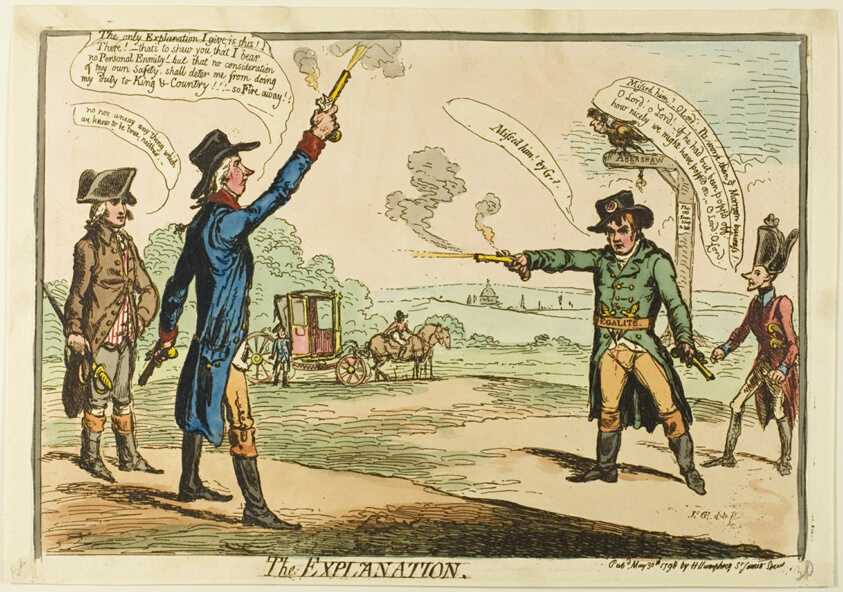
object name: Print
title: The Explanation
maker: James Gillray (English, 1756-1815); published by Hannah Humphrey (English, c. 1745-1818)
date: published May 30, 1798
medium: Hand-colored etching on paper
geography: England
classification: etching; print; prints and drawing